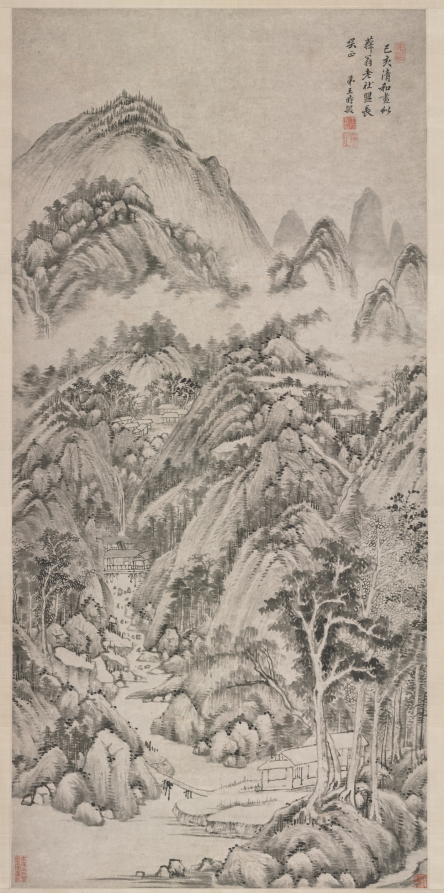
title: Mountain Village Embraced by the Summer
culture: China, Qing dynasty (1644-1911)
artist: Wang Shimin (Chinese, 1592–1680)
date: 1659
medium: hanging scroll, ink on paper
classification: Painting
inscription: Artist's inscription, signature, and 3 seals: [seal] Ouxie 偶諧. In the jihai year [1659], the fourth lunar month, I painted this for T'o-weng, my senior in our literary club, for your amusement and correction. Your junior Wang Shimin. [seals] Wang Shimin yin 王時敏印; Xunzhi 遜之.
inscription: 2 additional seals: 1 of Jiang Gusun [Chiang Ku-sun] 將穀孫 (20th century); 1 of C. C. Wang 王季遷 (1907–2003).